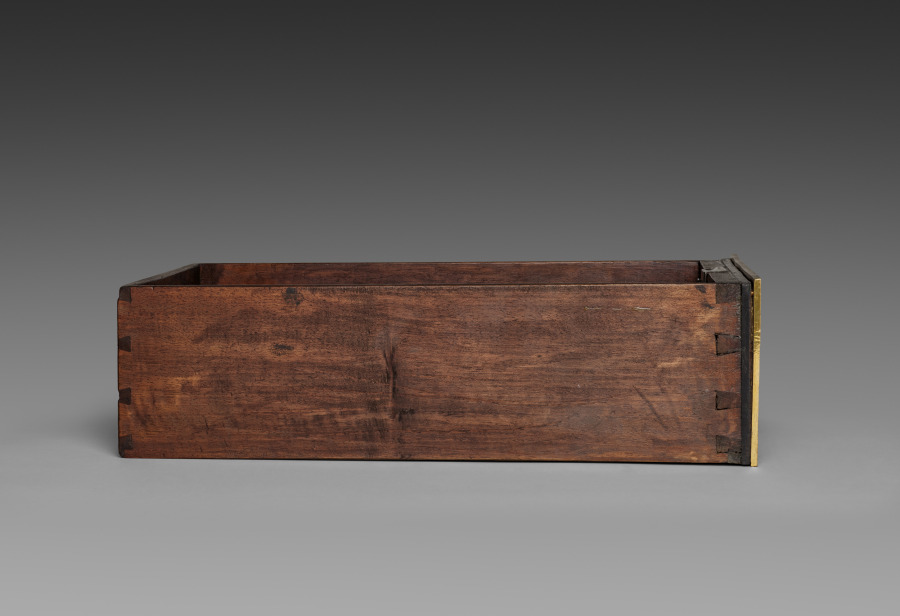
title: Side Drawer for Cabinet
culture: France, late 17th Century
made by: André-Charles Boulle (French, 1642–1732)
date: c. 1690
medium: ebony, marquetry in metal and tortoise shell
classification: Furniture and woodwork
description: Appointed cabinetmaker to King Louis XIV in 1672, André-Charles Boulle became a master of furniture making in France during the late 1600s until his death in 1732. Known primarily for his use of marquetry, in which metal patterns are inlaid into tortoiseshell then applied within the veneered surface of the furniture, Boulle established a level of quality and craftsmanship few others could achieve. As a result, his work found favor at the royal court and among other aristocrats and diplomats eager to impress the king. The inclusion of a medallion depicting Louis XIV within the bronze decoration of this chest would have identified the owner with the royal court. Often exhibiting stout architectural proportions with elegant groups of inlaid motifs such as the parrot on the central panel of this chest, Boulle’s designs are an example of the intellectual fashion for contrasting ideas, materials, and motifs.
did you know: Originally designed to sit atop an elaborate tall stand, this chest was likely altered in the late 1700s to reduce its scale and height.